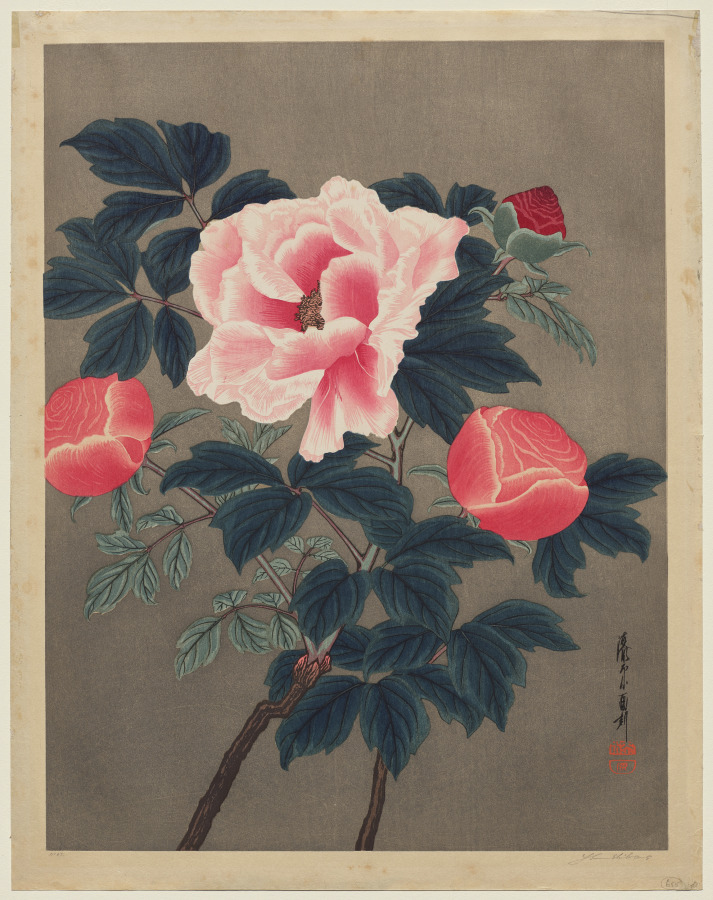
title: Peonies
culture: Japan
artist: Yoshijiro Urushibara (Japanese, 1889–1953)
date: c 1900s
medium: color woodcut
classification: Print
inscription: Lower margin, in graphite: "No 63 Yoshijiro"